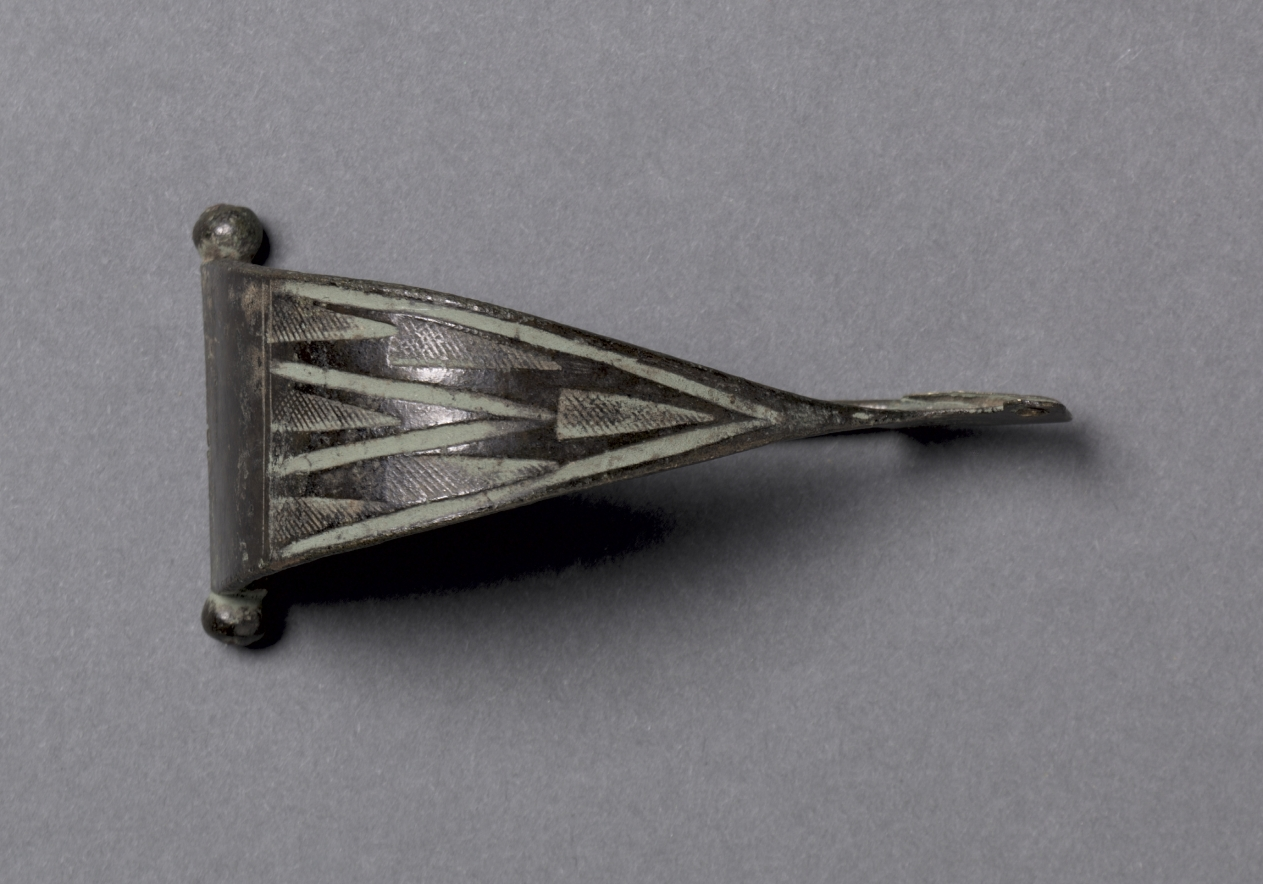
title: Fibula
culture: Classical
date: 450–1 BCE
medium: bronze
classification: Jewelry